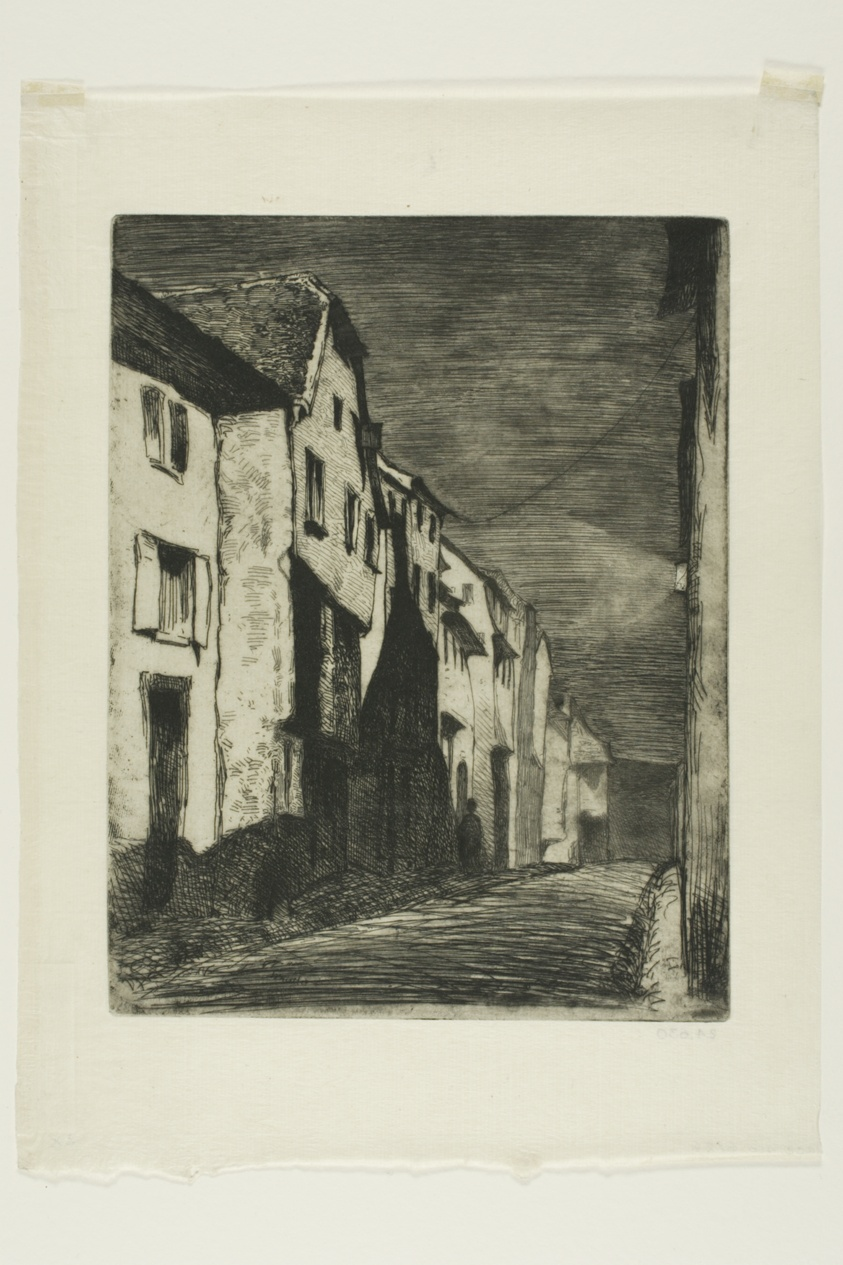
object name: Print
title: Street at Saverne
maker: James McNeill Whistler (American, 1834-1903)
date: 1858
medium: Etching with foul biting in black ink on ivory Japanese paper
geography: United States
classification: etching; foul biting; print; prints and drawing; paper